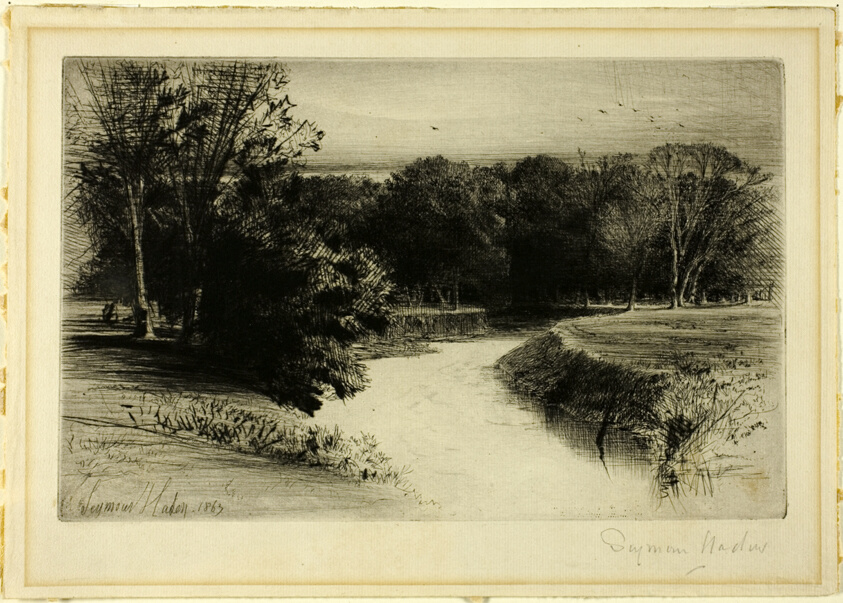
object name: Print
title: A Sunset in Ireland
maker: Francis Seymour Haden (English, 1818-1910)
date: 1863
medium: Etching and drypoint on cream laid paper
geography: England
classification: engraving; print; prints and drawing